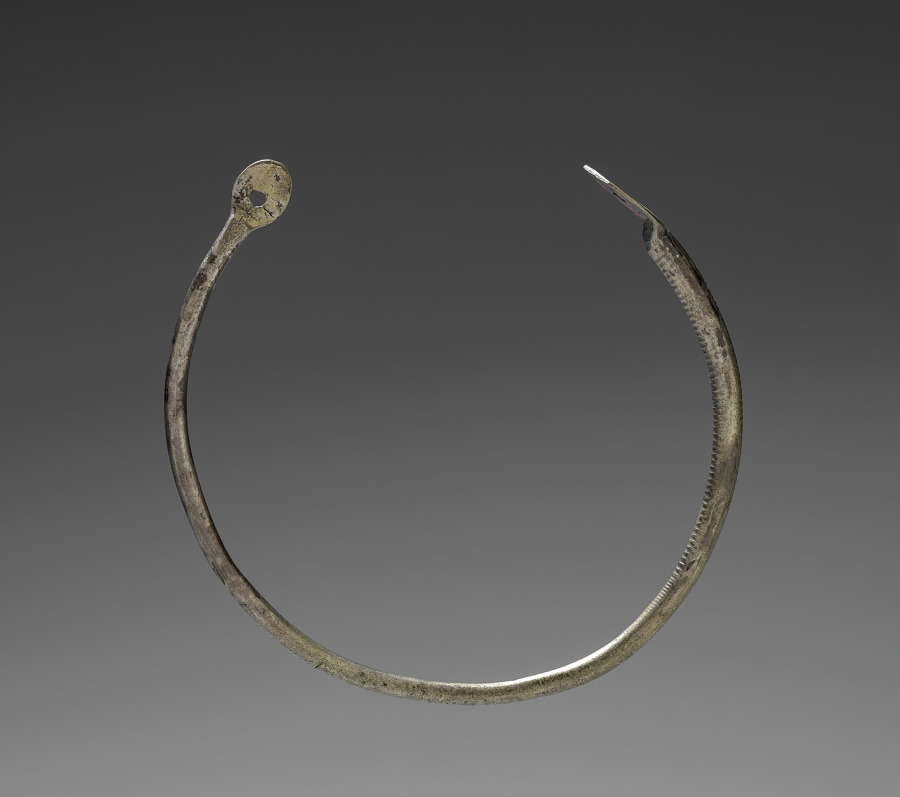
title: Nose Ring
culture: Indo-Chinese, made in France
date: 20th Century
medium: silver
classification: Jewelry